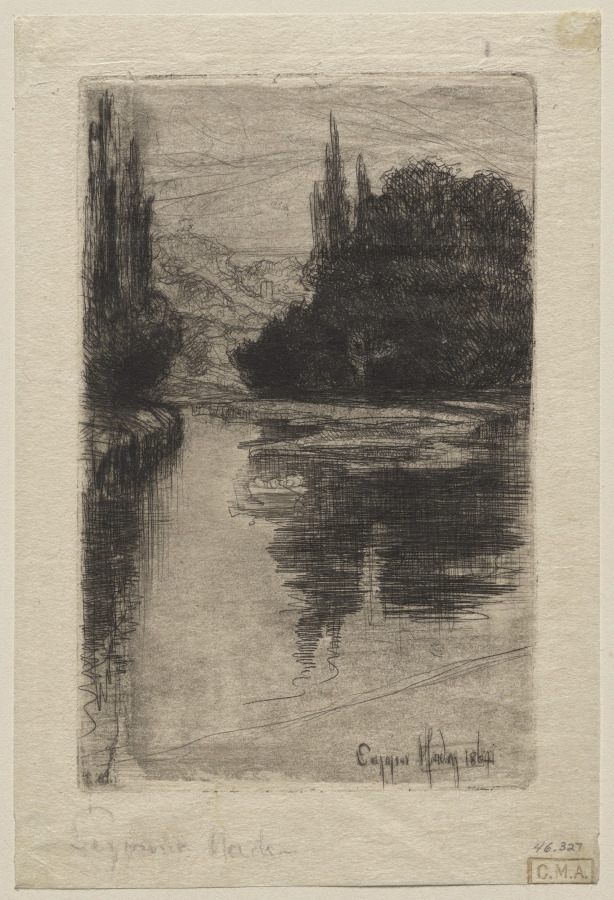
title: Evening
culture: England, 19th century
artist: Francis Seymour Haden (British, 1818–1910)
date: 1864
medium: etching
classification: Print